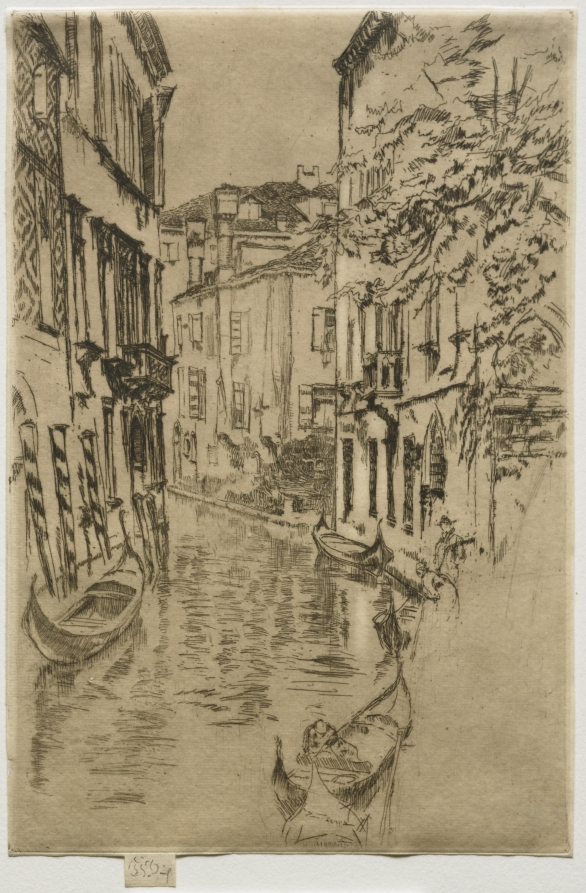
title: Quiet Canal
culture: America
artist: James McNeill Whistler (American, 1834–1903)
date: 1879–80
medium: etching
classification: Print